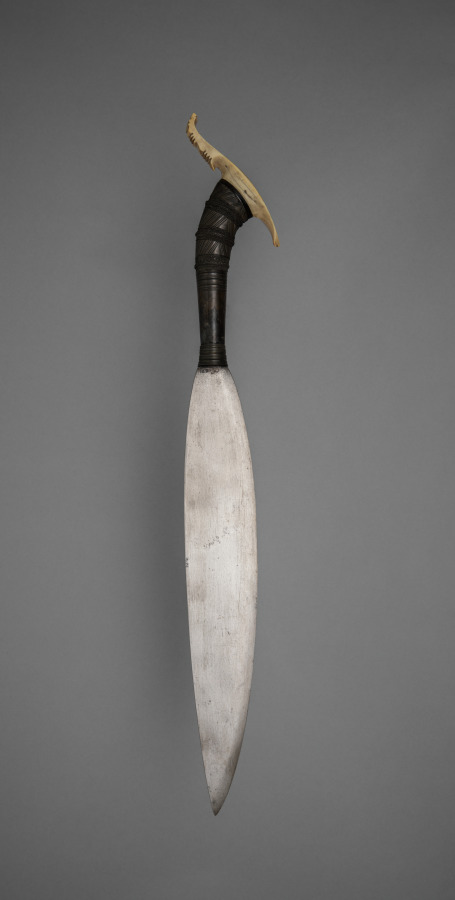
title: Sword (Barong)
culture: Philippines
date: c. 1800s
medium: Blade: steel; handle: silver with braided wire; pommel: ivory with carabao horn inlay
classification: Arms and Armor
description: This sword has a broad, leaf-shaped blade characteristic of the Sulu Archipelago. Its profile suggests it was used for powerful cut-and-slash fighting. The ivory pommel, inlaid with black hardwood, takes the form of a stylized cockatoo (kakatua). This feature, along with the finely worked horn grip, indicates that this was a prestige weapon owned by a member of the warrior nobility.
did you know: The grip is made of carabao horn, a draft animal similar to the water buffalo.